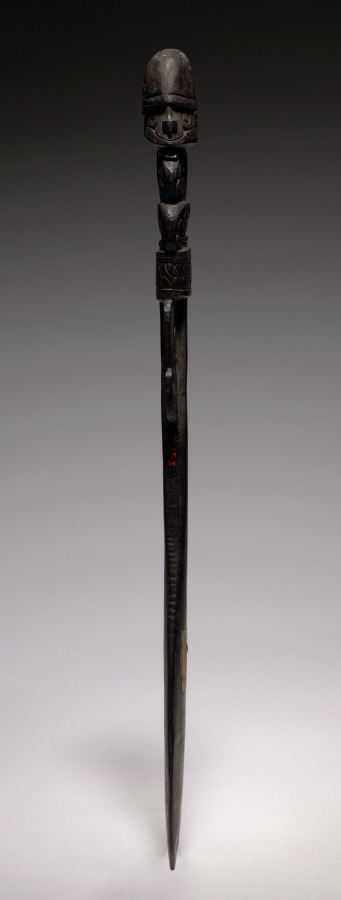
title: Lime Spatula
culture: Melanesia, New Guinea, Massim Area, Trobriand Islands, 20th century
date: before 1930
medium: wood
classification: Sculpture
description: Intricately carved spatulas (chunum) were used to remove a mixture of areca nut, lime, and betel pepper from gourd containers for chewing. The stylized human face and figure are decorated with lime-filled incised designs.